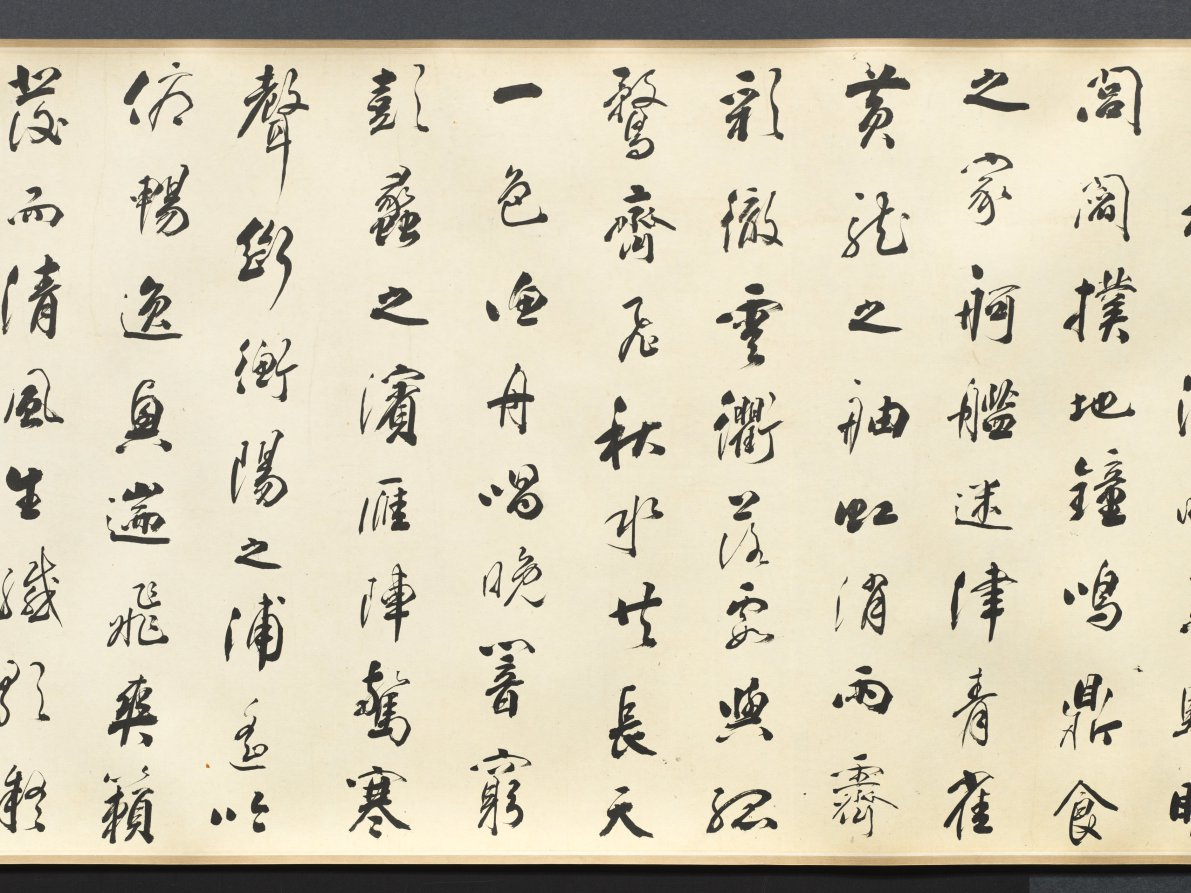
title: Calligraphy in Running Style based on Wang Bo's Essay on Tengwang Pavilion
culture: China, Changbai, Qing dynasty (1644-1911)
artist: Tiebao (Chinese, 1752–1824)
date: 1811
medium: handscroll, ink on paper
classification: Calligraphy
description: A member of the Donggo clan, Tiebao belonged to the Manchu Plain Yellow Banner army. As an official in the Qing court, he endured considerable vicissitude and his career was never smooth. Celebrated as a man of letters, he oversaw the publications of the Manchu military system as well as an anthology of poems by members of the imperial family and other Manchu dignitaries. In calligraphy, he was regarded as the equal of such eighteenth-century luminaries as Liu Yong (1720-1805) and Weng Fanggang (1733-1818). This handscroll is a work of his mature years and is exemplary of his disciplined and highly subtle approach to the art of calligraphy.